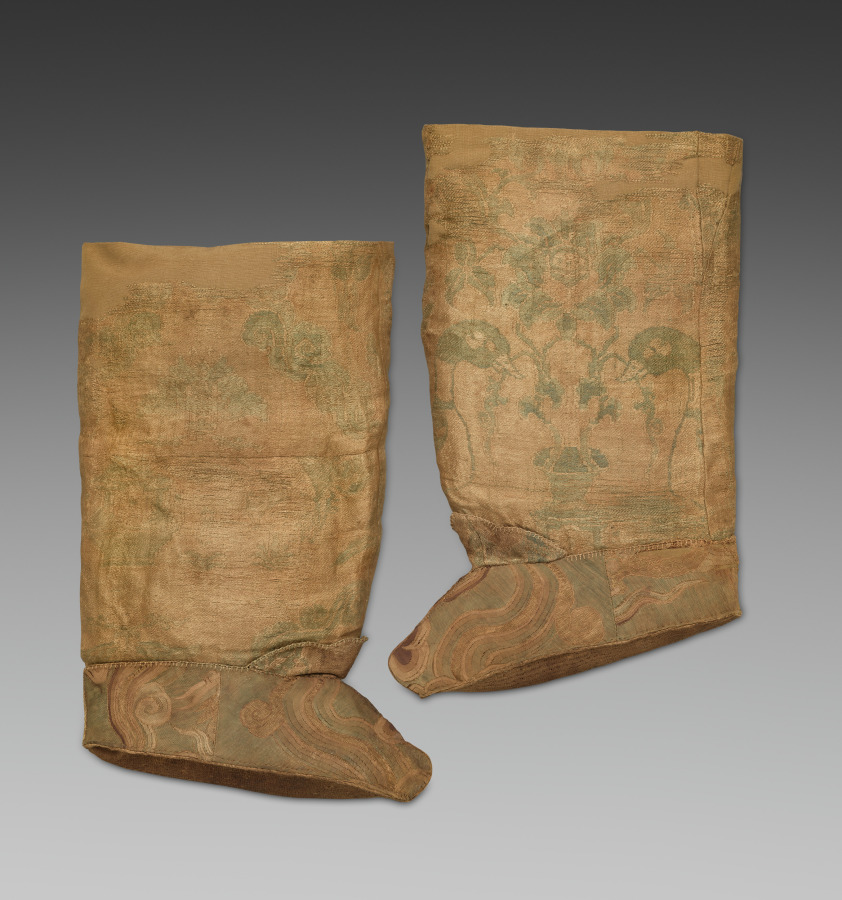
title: Pair of Boots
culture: China, Northern, Liao dynasty (907-1125)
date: 1000–1125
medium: Silk: compound twill; silk and gold: tapestry; silk: tabby, gauze, batting; leather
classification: Garment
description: The fabric and tailoring of garments have always defined social status. For these boots, different outer fabrics were used: a patterned silk for the leg portion, and tapestry (kesi) for the foot. Since both were considered luxury fabrics, they were pieced together from remnants too precious to discard. Consequently, the silk pattern was not used in relation to the form of the boot, as seen in some other imperial boots. By contrast, these boots would have been made for a court official, not a member of the imperial family. The patterned silk was woven with geese flanking a vase of flowers on a stand and surrounded by cloud scrolls. The Chinese motif of flowers arranged in a vase was adopted by the Liao during the 11th century and indicates an 11th- or early 12th-century date for the boots.